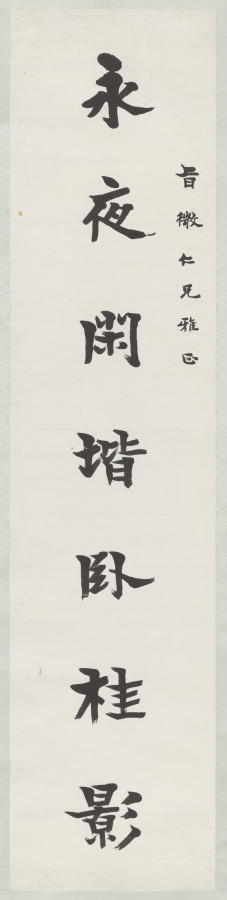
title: Right Scroll from Calligraphy Couplet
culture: China, Republican period (1912-49)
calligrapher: Liang Qichao (Chinese, 1873–1929)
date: after 1911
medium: One of a pair of hanging scrolls; ink on paper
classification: Calligraphy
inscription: 永夜鬧皆臥桂影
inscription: 旨徽仁兄雅心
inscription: 清晨簾幕卷輕霜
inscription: 梁啟超筆宋詞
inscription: [印] 新會梁氏. [印] 啓超和印.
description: The prominent politician and modern reformer Liang Qichao writes here in an angular, firm, and little modulated regular script style, inspired by inscriptions incised on ancient stone steles. Those script styles were popular among reformers of the time, as they sought to revive the ancient culture and built a new China on the country’s strong ancient foundations. Each scroll cites the verse of a historic cultural figure in Chinese history.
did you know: Liang Qichao aimed to reform the country and strengthen its foundations through the revival of the ancient culture of China.